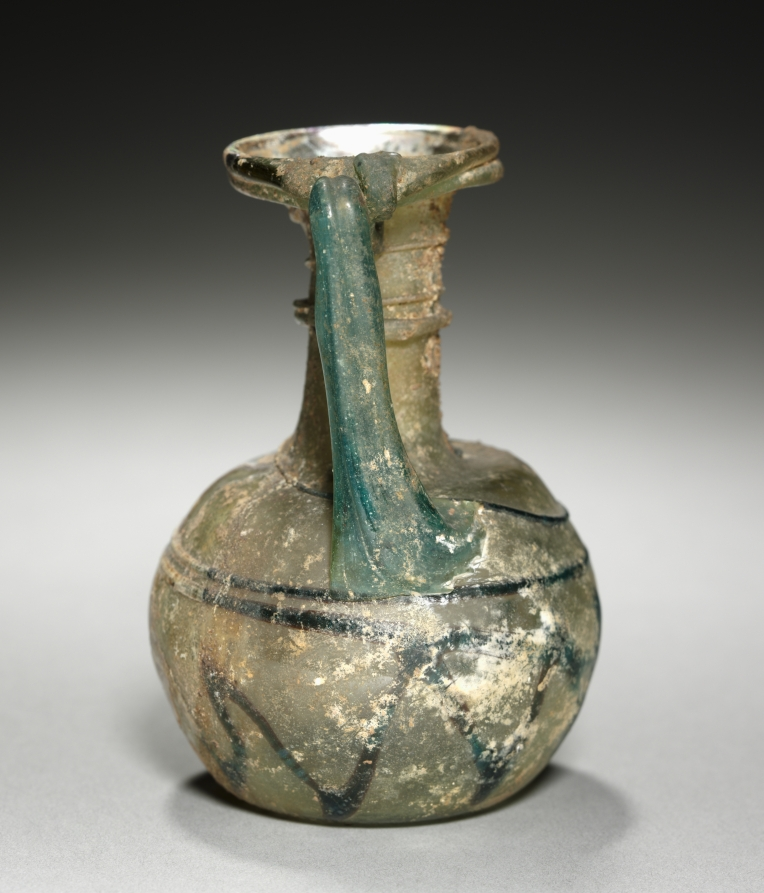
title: Squat Juglet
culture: Italy, Roman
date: 300–500 CE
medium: green glass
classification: Glass